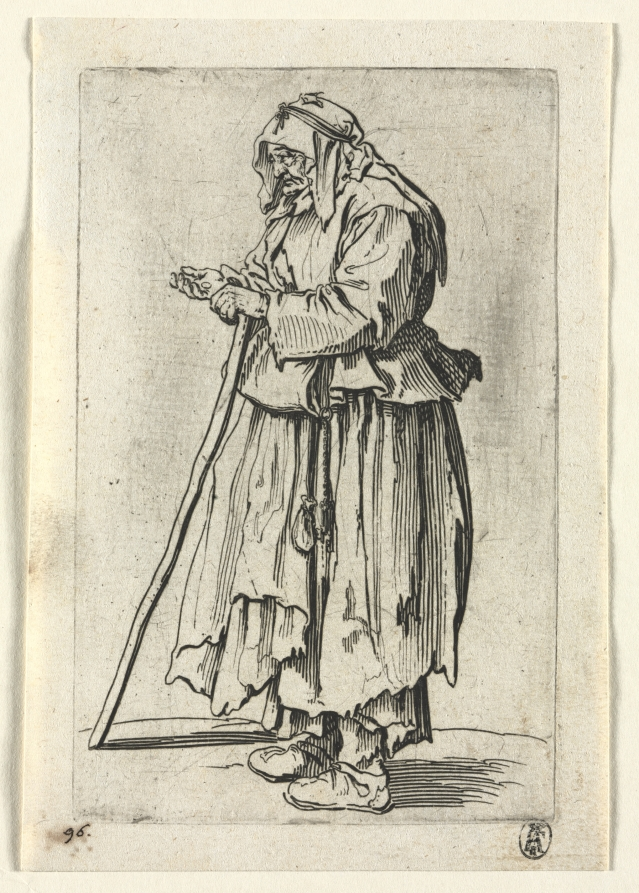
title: The Beggars: Beggar Woman Coming to Receive Alms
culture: France, 17th century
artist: Jacques Callot (French, 1592–1635)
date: c. 1623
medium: etching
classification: Print